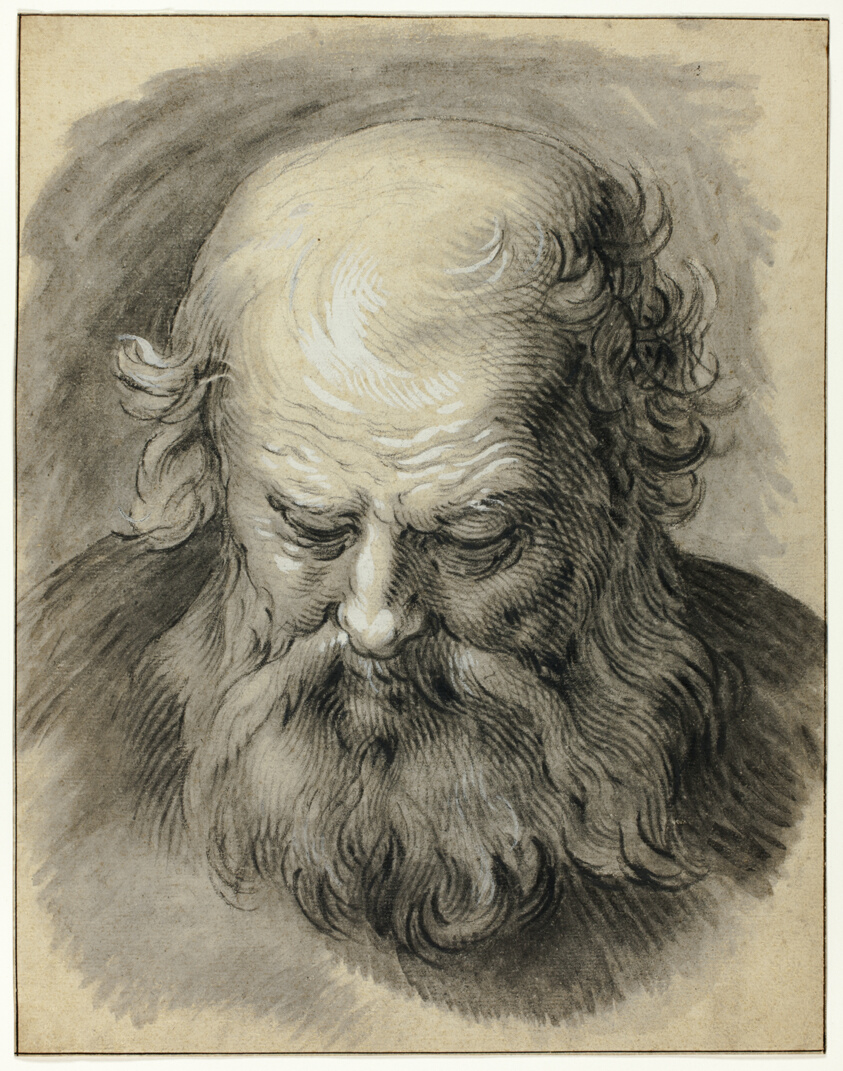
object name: Drawing and Watercolor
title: Study of the Head of a Bearded Man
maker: Abraham Bloemaert (Dutch, 1566-1651)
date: 1595/1605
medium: Black chalk, with brush and black chalk wash, heightened with opaque white watercolor, over touches of charcoal, on tan laid paper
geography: Holland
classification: ink or chalk wash; drawings (visual works); prints and drawing